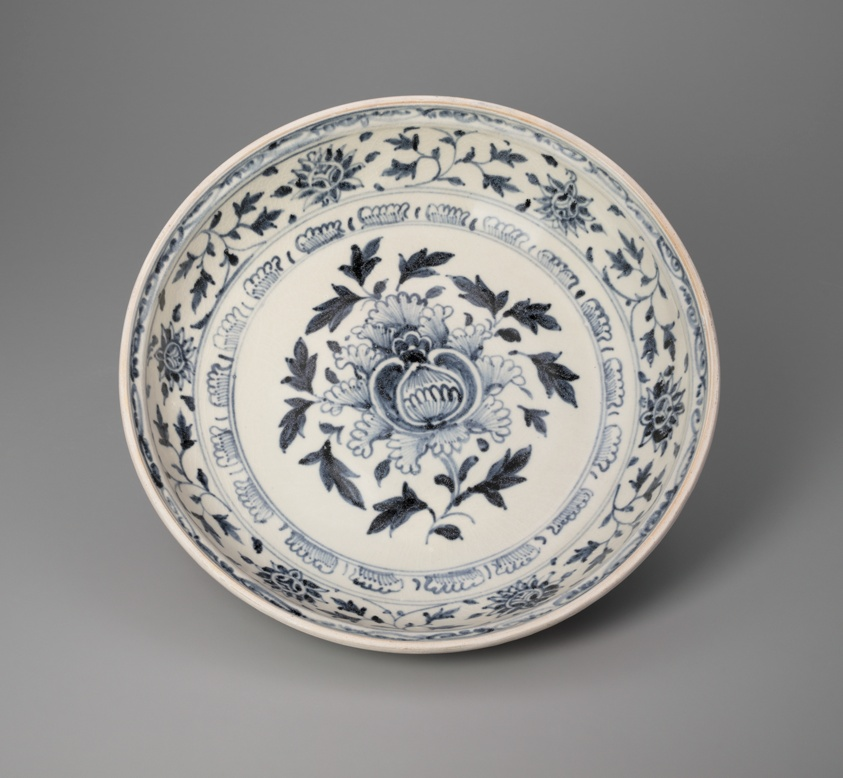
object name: Ceramics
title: Large Dish with Pomegranate and Leaf Design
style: Southeast Asian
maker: Vietnam; near Hoi An (offshore)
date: Late 15th/early 16th century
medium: Glazed stoneware with cobalt-blue underglaze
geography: Vietnam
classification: plate (general, dish); dish (vessel); ceramics